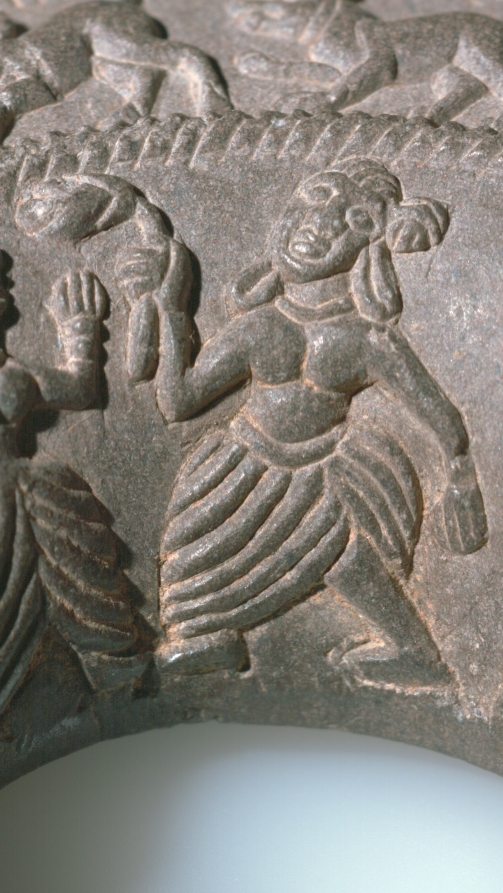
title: Ringstone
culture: India, Maurya period (322–185 BCE)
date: 200s BCE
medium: steatite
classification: Sculpture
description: Ringstones are among the earliest works of art to be created in stone during India's historical period. This example is finely carved with detailed images of affectionate couples and palm trees, running animals, and geometric motifs in concentric circles. The function of ringstones remains uncertain, since none of the surviving examples is inscribed or explained in a text.